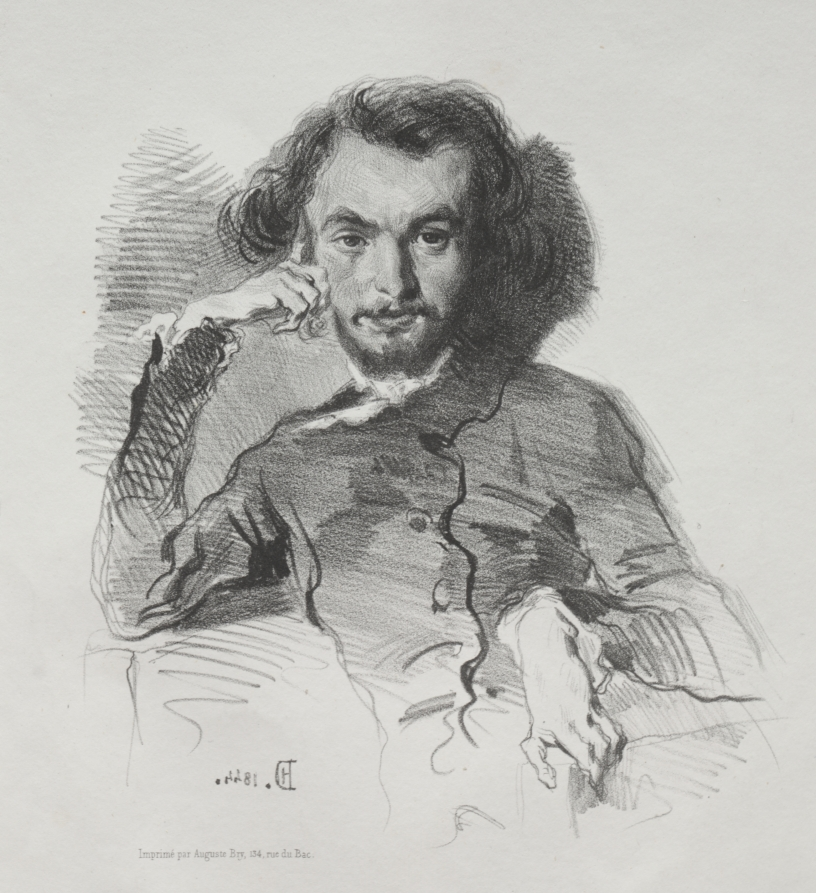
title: Charles Pierre Baudelaire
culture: France, 19th century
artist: Émile Isidore Deroy (French, 1820–1846)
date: 1844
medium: lithograph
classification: Print